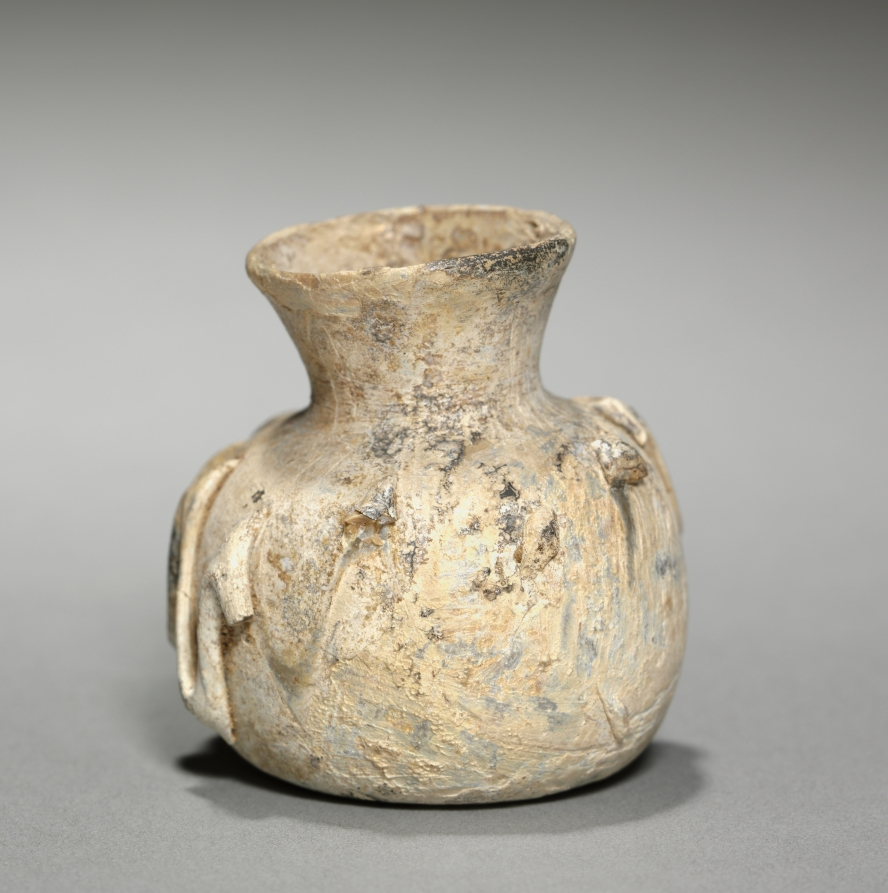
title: Vase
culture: Eastern Mediterranean, Roman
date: 200–500 CE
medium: glass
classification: Glass